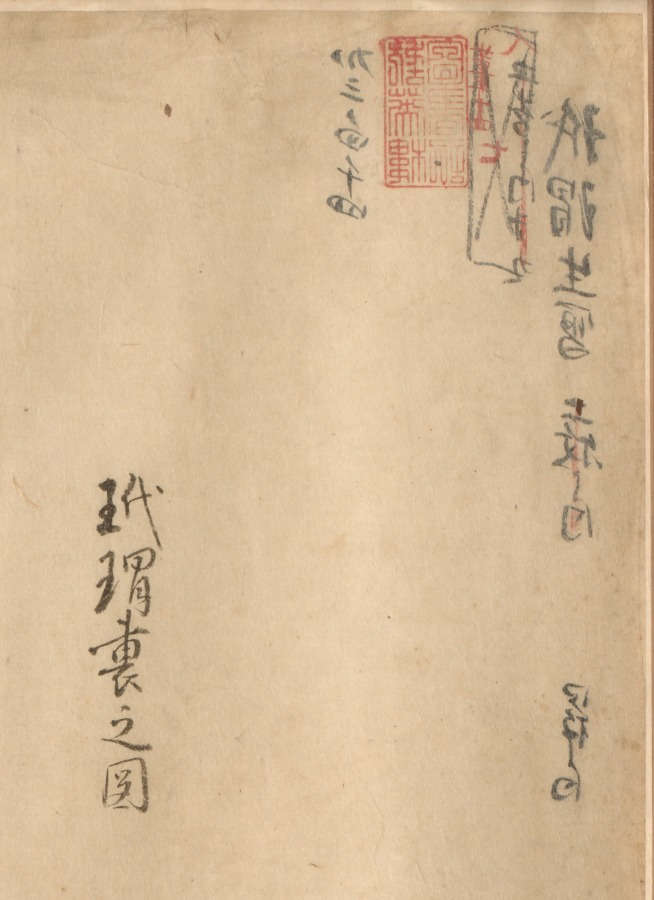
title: Tortoise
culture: Japan, Edo period (1615–1868)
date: 1700s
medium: watercolor on paper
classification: Painting